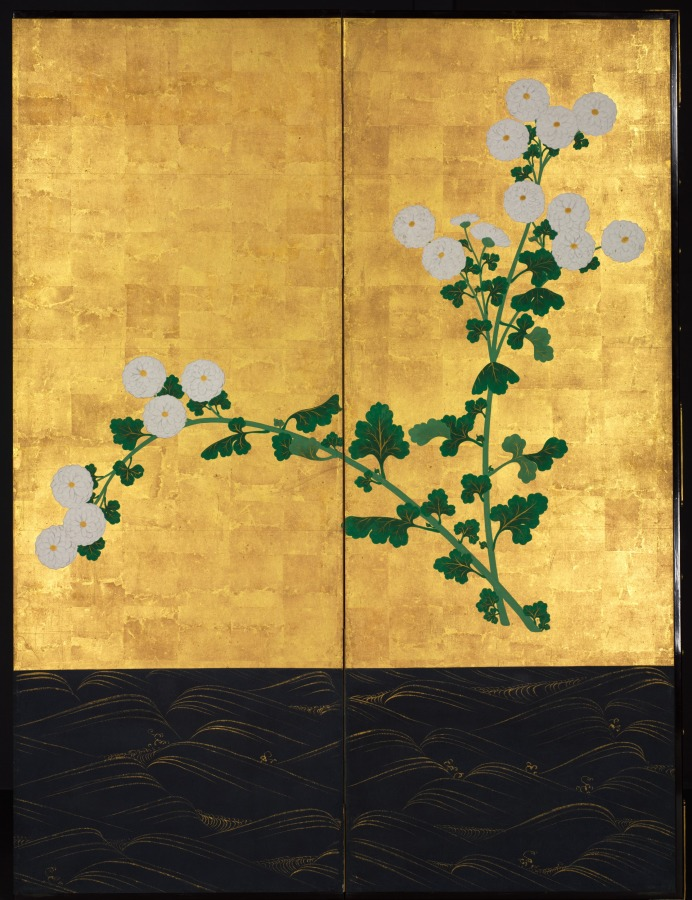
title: Chrysanthemums by a Stream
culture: Japan, Edo period (1615–1868)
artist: possibly by Ogata Kōrin (Japanese, 1658–1716)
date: c. 1715–30 or after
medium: One of a pair of six-panel folding screens; ink and color on gilded paper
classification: Painting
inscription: the signature and seal of Korin, "sensen mappa (makko) inshi hokyo Korin" (late generation hermit of the Kamo stream tradition) is written in two lines. A circular seal which reads "Hoshuku" is at the end of the second line on the edge of the first panel from the right.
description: These screens recall a painting style so closely identified with Ogata Kōrin (1658–1716) that it is called Rinpa, or “Rin School,” after the ideograph “rin” in his name. The highly stylized background accentuates floral groupings that have been groomed so as to appear utterly artificial, like the synthetic arrangements available today. Kōrin's genius derived in large measure from natural phenomena painstakingly observed and then manipulated to create compositions of startling refinement and sparkling isolation. This process may have grown out of Kōrin's early immersion in the family textile business, a medium that encourages such dramatic distillations of form: the stream's gold-crested waves bring to mind traditional kimono robe designs of Kōrin's era. Works with the signature seen on this painting, including a style name, or persona suggested to Kōrin by his brother Kenzan (1663–1743), are sometimes considered to have been produced either in the last year of his life, when he was very ill, or after his death. In both scenarios, the lion’s share of the work would have been done by studio assistants, but little is truly known of his studio practice. Given the regularity of the gold waves on the stream, and the tension in the arrangement of the chrysanthemums, it is also possible that the screens were made in emulation of Kōrin's designs by a later artist.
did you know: The signature used on these screens may indicate paintings made in the last year of the artist's life, or works completed by his studio after his death.